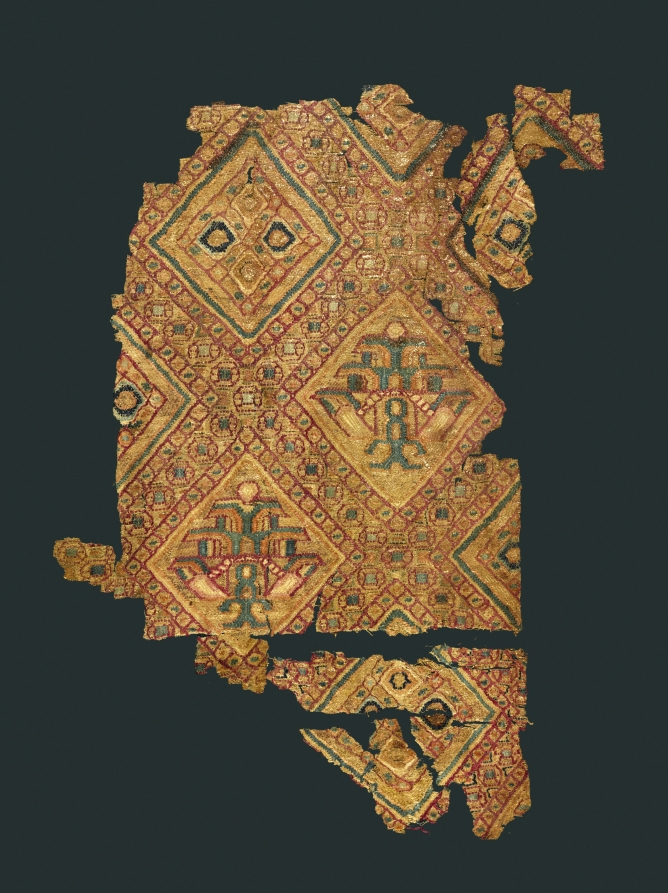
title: Fragment with jewel-like silk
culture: Iraq, probably Baghdad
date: 800s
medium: Silk: plain weave, brocaded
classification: Textile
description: This fragment is brocaded in a jewel-toned silks: red, rose, turquoise, salmon pink, pale pink, golden tan, green, dark blue, and dark brown. Flat strips of gold foil were wound on tan silk strands to create gold thread adding to the luxuriousness of the brocade.